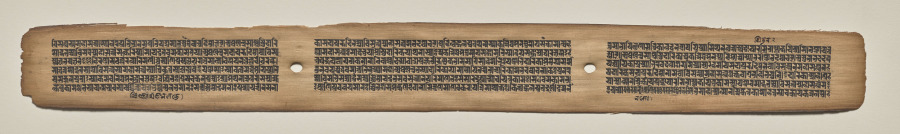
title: Text, folio 177 (recto), from a Manuscript of the Perfection of Wisdom in Eight Thousand Lines (Ashtasahasrika Prajnaparamita-sutra)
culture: Eastern India, Bihar, Vikramashila Monastery. Painting: Nepal, Kathmandu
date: Sunday, September 14, 1119 (year 239 of the Newar Samvat in the month of Ashvina)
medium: gum tempera and ink on palm leaves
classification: Painting